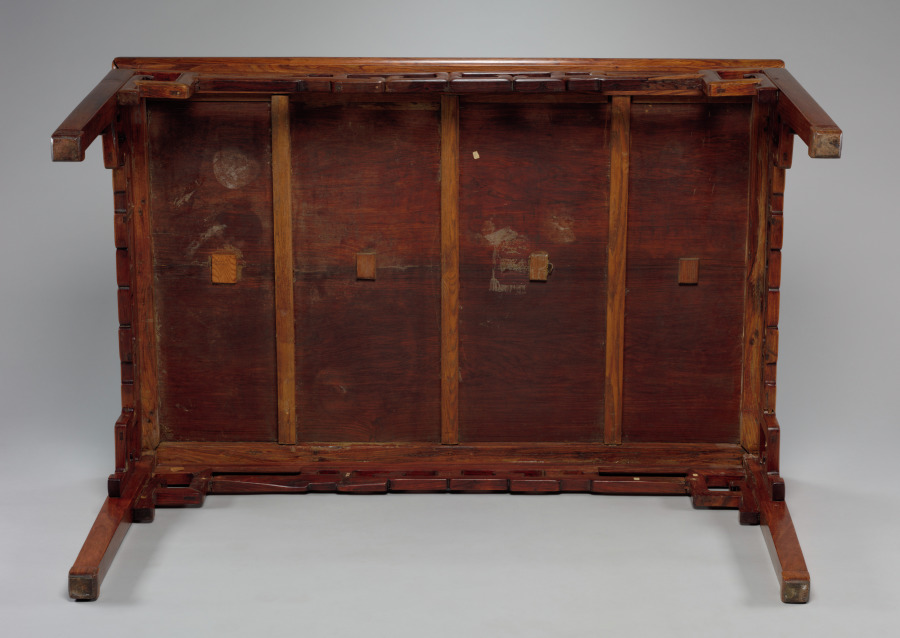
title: Center Table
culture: China, Ming dynasty (1368-1644) - Qing dynasty (1644-1911)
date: 1600s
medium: huali (ptero-carpus indicus [Burmese or East Indian Rosewood])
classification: Furniture and woodwork